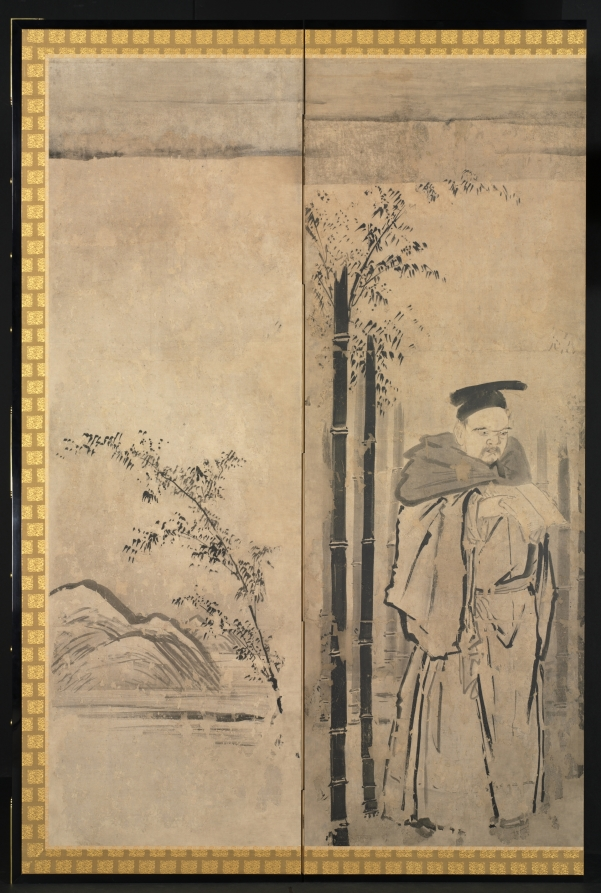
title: Seven Sages of the Bamboo Grove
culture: Japan, Edo period (1615–1868)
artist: Kano Tan’yū (Japanese, 1602–1674)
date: 1600s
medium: pair of six-fold screens; ink on paper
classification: Painting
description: The Kano school was a group of professional artists patronized by the shogun from the late Muromachi period to the Edo period. The group adopted themes of reclusiveness to convey the importance of loyalty to the shogunate. A leader of the Edo Kano school, Kano Tanyu paired Seven Sages of the Bamboo Grove and Four Elders of Mt. Shang to reference a painting of the same theme attributed to Kano Motonobu. Seven Sages of the Bamboo Grove refers to the elites who escaped the social chaos of China’s Wei-Jin period (AD 200s–400s); they fled to a secluded bamboo grove where they could express themselves freely, enjoying pure conversation, music, and wine. The other screen, Four Elders of Mt. Shang, depicts the scholars who left the turbulence of the late Qin dynasty to pursue their scholarly interests in seclusion on Mt. Shang in Shanxi province.